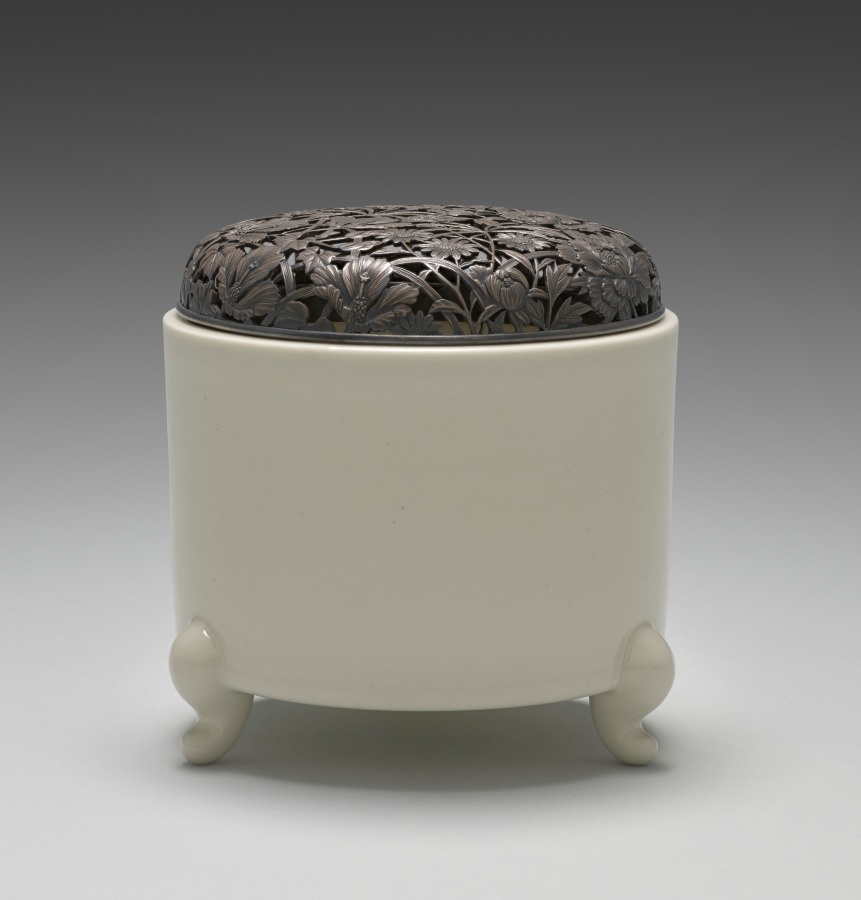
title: Incense Burner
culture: Japan, Meiji period (1868–1912)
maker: Seifū Yohei III (Japanese, 1851–1914)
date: 1893–1914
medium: Porcelain with creamy white glaze and molded design and floral openwork silver lid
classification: Ceramic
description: Yohei III made incense burners in a wide variety of designs and styles. The body and glaze of this one are taihakuji, or “great white porcelain,” an important early invention Yohei III devised in 1872. The burner has rounded, cabriole legs, resembling tiny table legs, attached to the exterior and the faintest decorative band around the bottom. Lids were produced outside the studio by metalwork specialists. For this incense burner, they created a floral-patterned silver lid.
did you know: This cylindrical incense burner has a distinctive translucent, creamy glaze over an ivory-colored clay body.